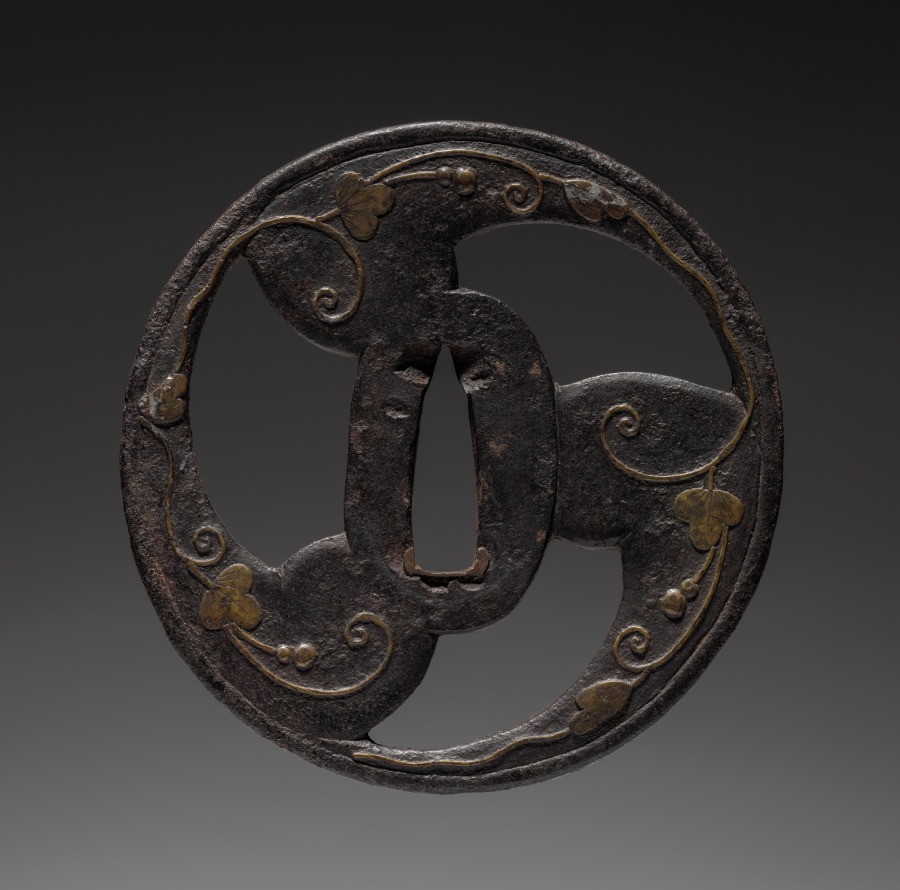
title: Sword Guard (Tsuba)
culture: Japan, possibly Edo period (1615-1868)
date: c. 1615–1868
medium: iron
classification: Arms and Armor